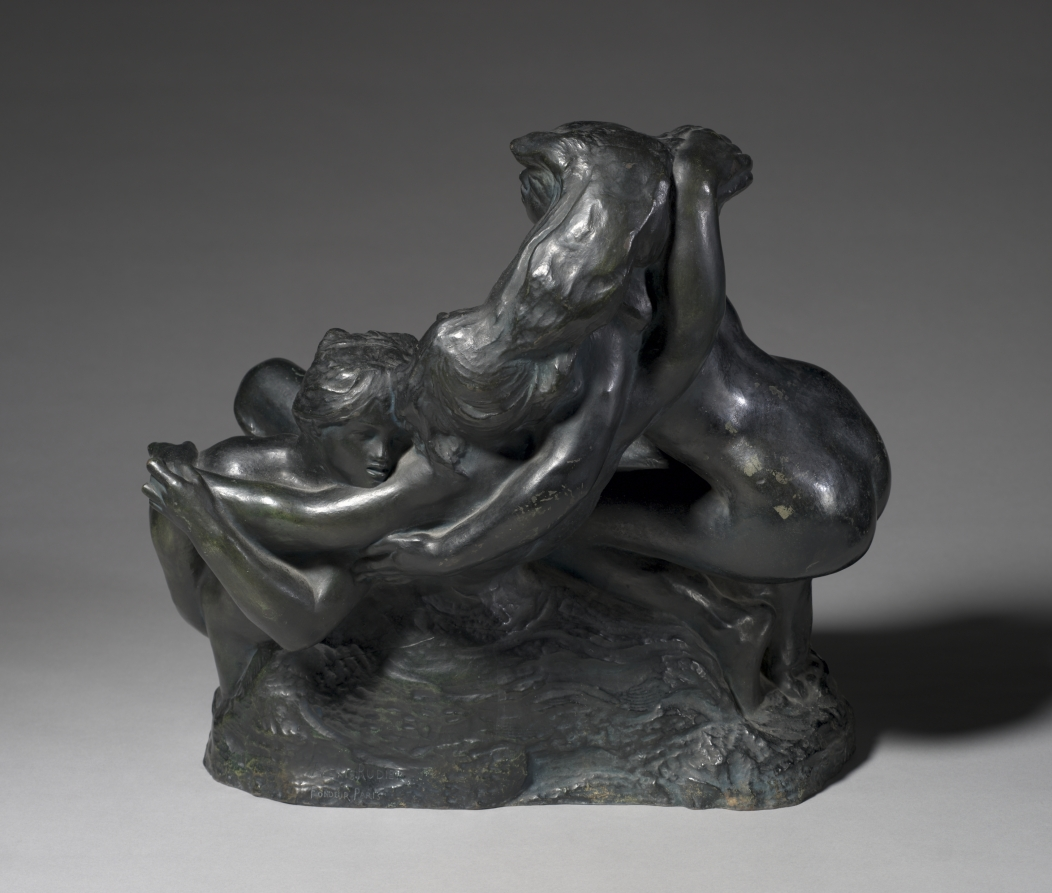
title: The Sirens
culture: France, late 19th-early 20th century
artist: Auguste Rodin (French, 1840–1917)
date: 1889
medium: bronze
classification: Sculpture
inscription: on back: Alexis Rudier/Fondeur 1889, Paris; on inside, separate piece: A. Rodin; on front, left: A. Rodin. Sticker on inside: P. Navez Exposition de Pittsburgh les Syrenes Collection Rodin (du Musée Rodin) No. 131.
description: Rodin intended The Gates of Hell (based on Dante’s The Divine Comedy) to be the great work of his life. It was never executed as originally planned, but Rodin created a number of sculptures for the project that were later treated separately. Among them was this group of three nude women entitled The Sirens.